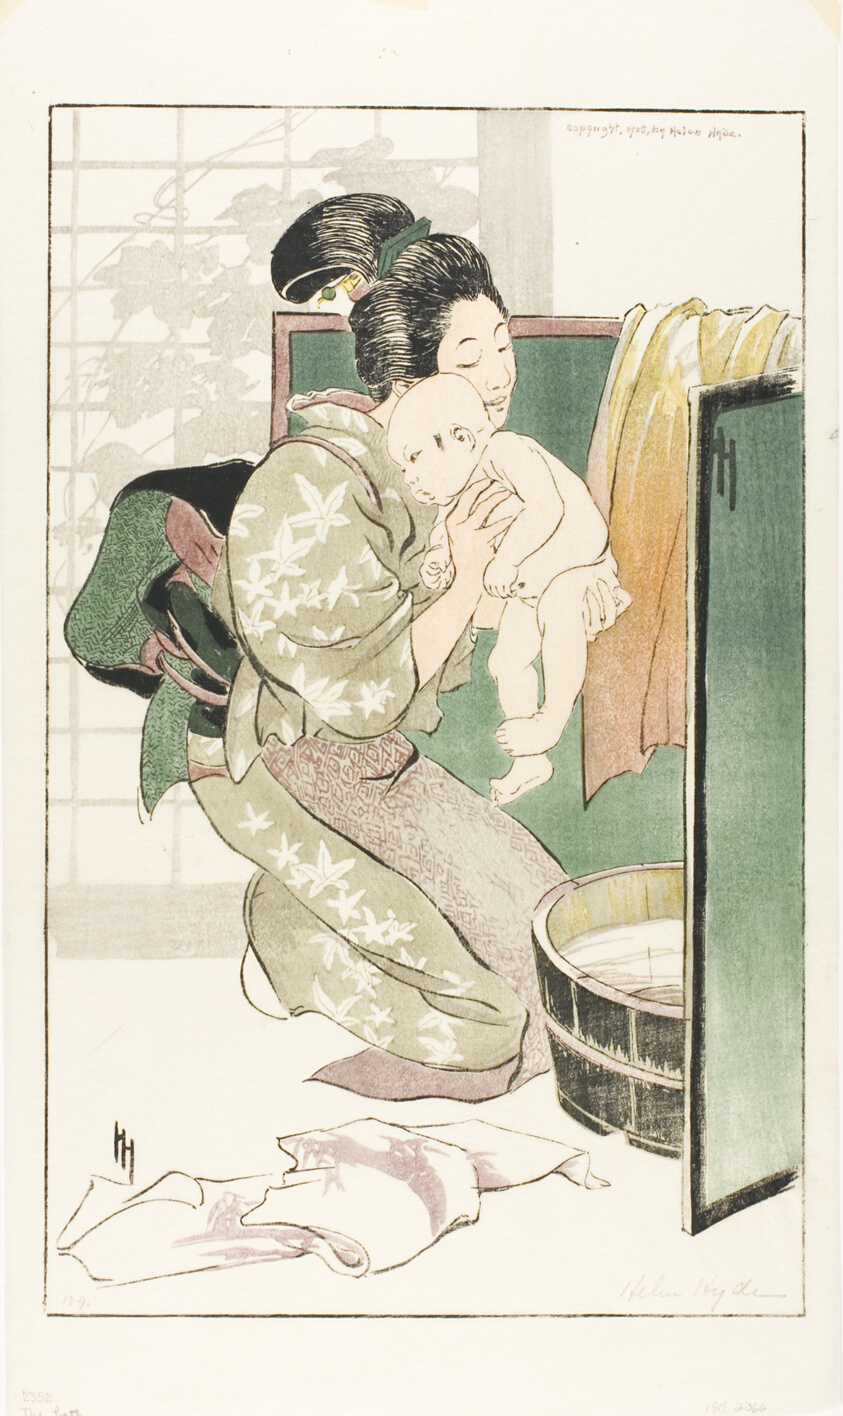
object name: Print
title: The Bath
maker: Helen Hyde (American, 1868-1919)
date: 1905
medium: Color woodcut on ivory Japanese paper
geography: United States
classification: woodcut; print; prints and drawing